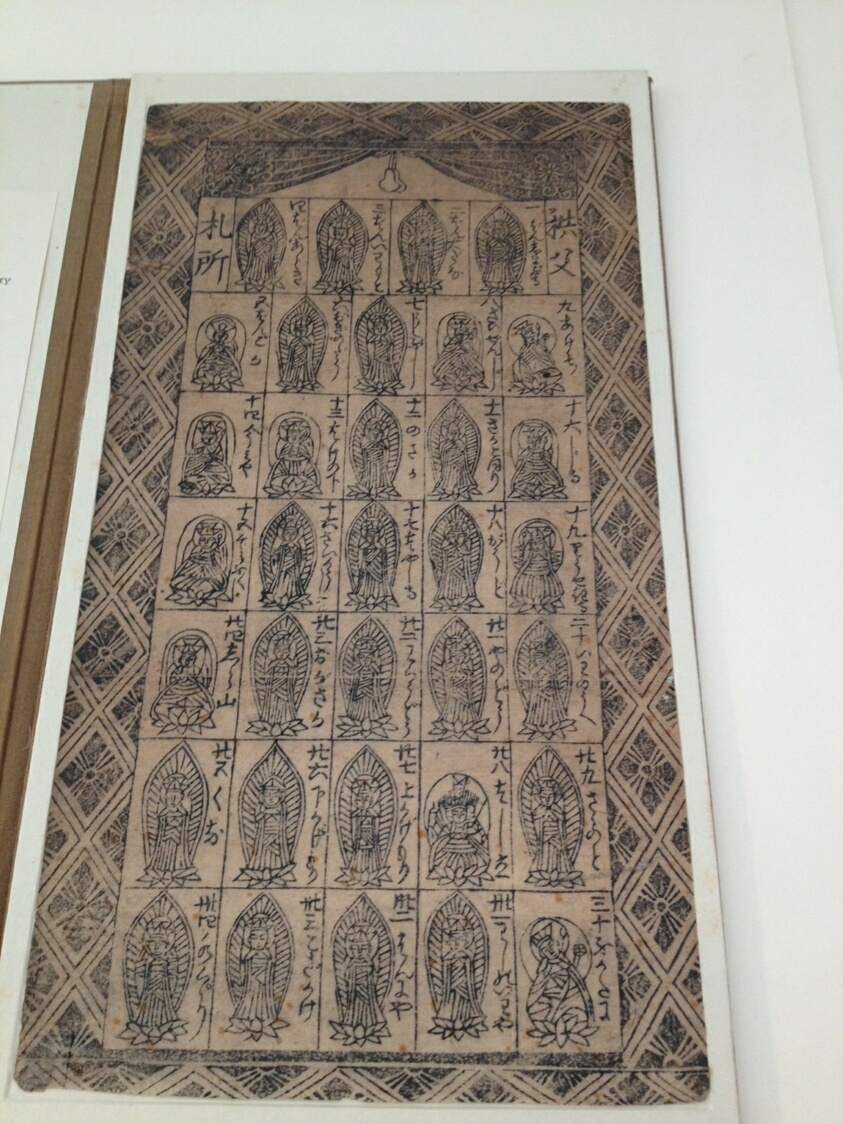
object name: Print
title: Charm from the 34 Chichibu Temples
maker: Unknown artist; Japanese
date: 17th Century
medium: Woodblock print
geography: Japan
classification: print; asian art